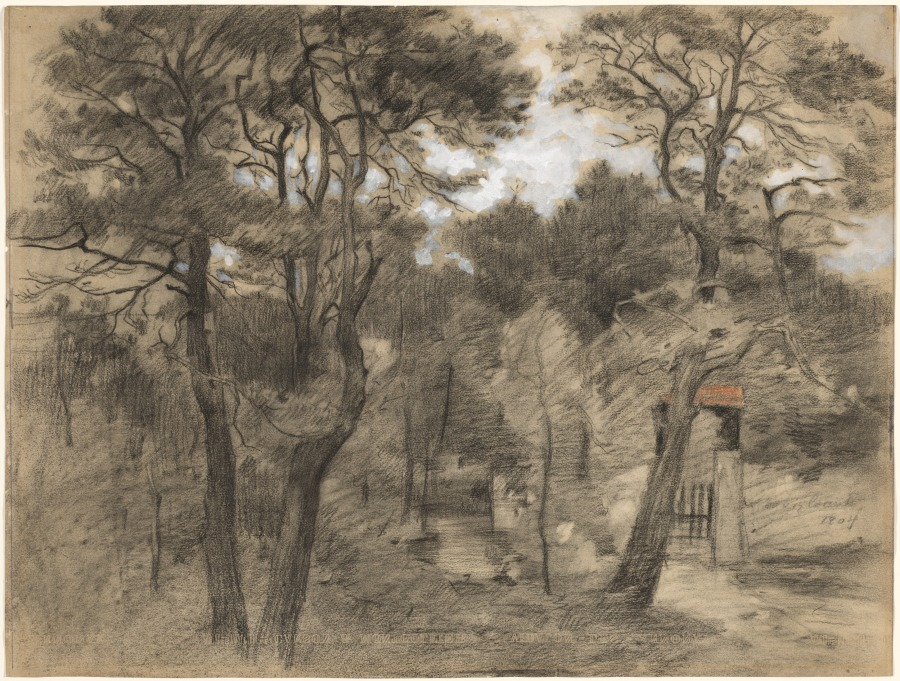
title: Landscape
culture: Germany, early 20th Century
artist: Lovis Corinth (German, 1858–1925)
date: 1904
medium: charcoal with orange pastel and white gouache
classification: Drawing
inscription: signed, lower right, in charcoal: Lovis Corinth / 1904 ; VERSO, upper left, in graphite: cust[illegible] / [auf?] P[illegible] / gi[illegible] RV / [illegible] [upsidedown] ; upper right, in graphite: [illegible] [sideways] ; center, in graphite: 131 g[illegible] [upsidedown] ; lower right, in charcoal: [illegible]trom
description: A seasoned draftsman, Corinth produced more than 2,000 drawings over the course of his life. An elaborate crosshatch pattern of tightly packed charcoal lines creates this naturalistic view of a wooded landscape. The pale sky, described with white gouache on a tan sheet, suggests a cold, gray day; the palette is restrained except for a vibrant square of orange delineating the roof of a shed.